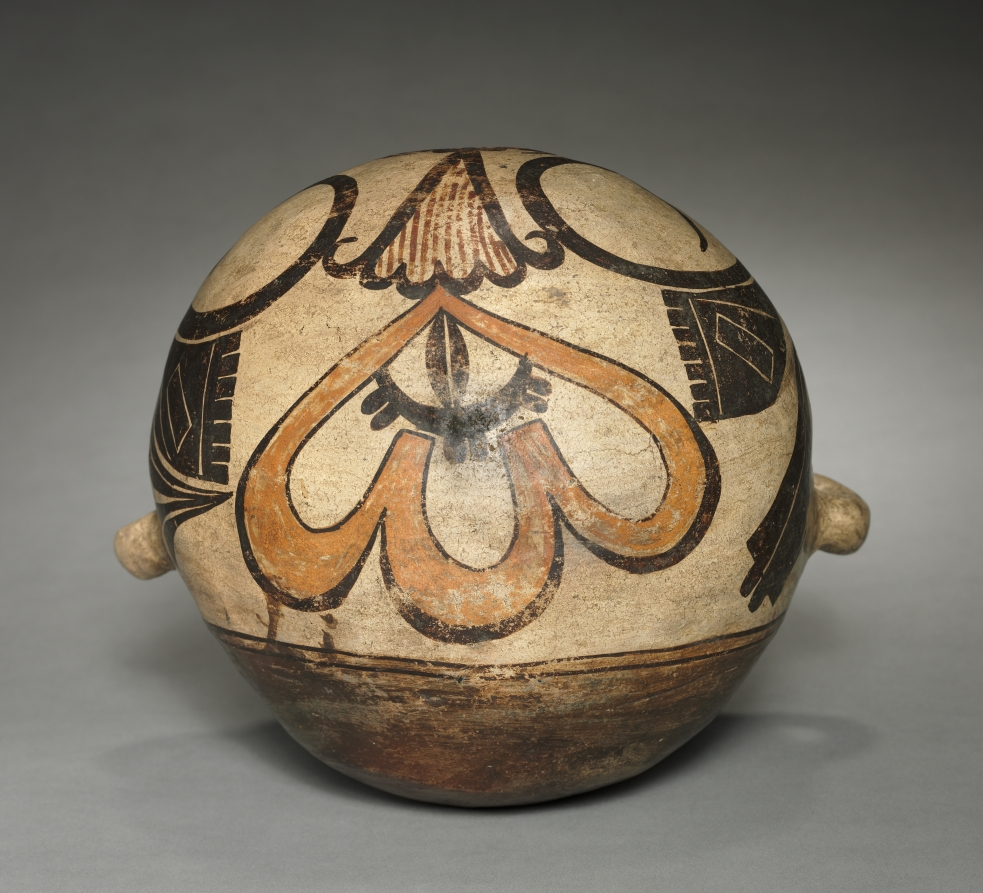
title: Canteen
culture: Native North America, Southwest, Arizona, Pueblo, Hopi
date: 1870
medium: ceramic, slip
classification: Ceramic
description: Since the 1500s, Hopi women made big-bellied canteens, based on Spanish prototypes, and used them to carry water. By the late 1800s, canteens became popular with Euro-American tourists, who increasingly flocked to the Southwest in search of encounters with “exotic” Native American cultures. Thus, Hopi artists embellished their wares to improve their appeal, here with graceful abstract forms.